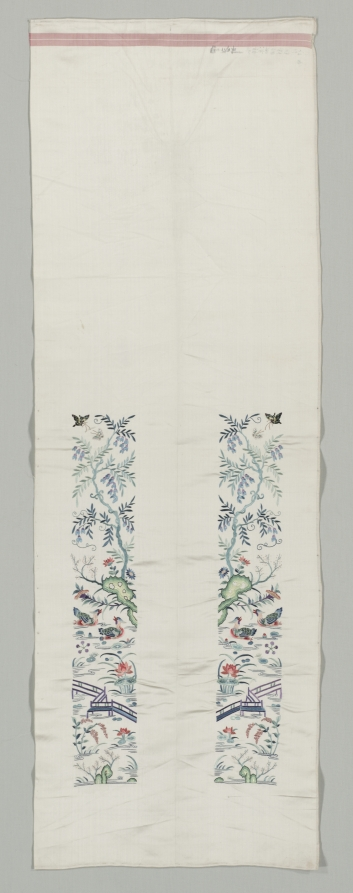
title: Uncut Sleeve Bands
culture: China, early 20th Century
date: early 1900s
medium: satin weave silk with silk embroidery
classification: Garment